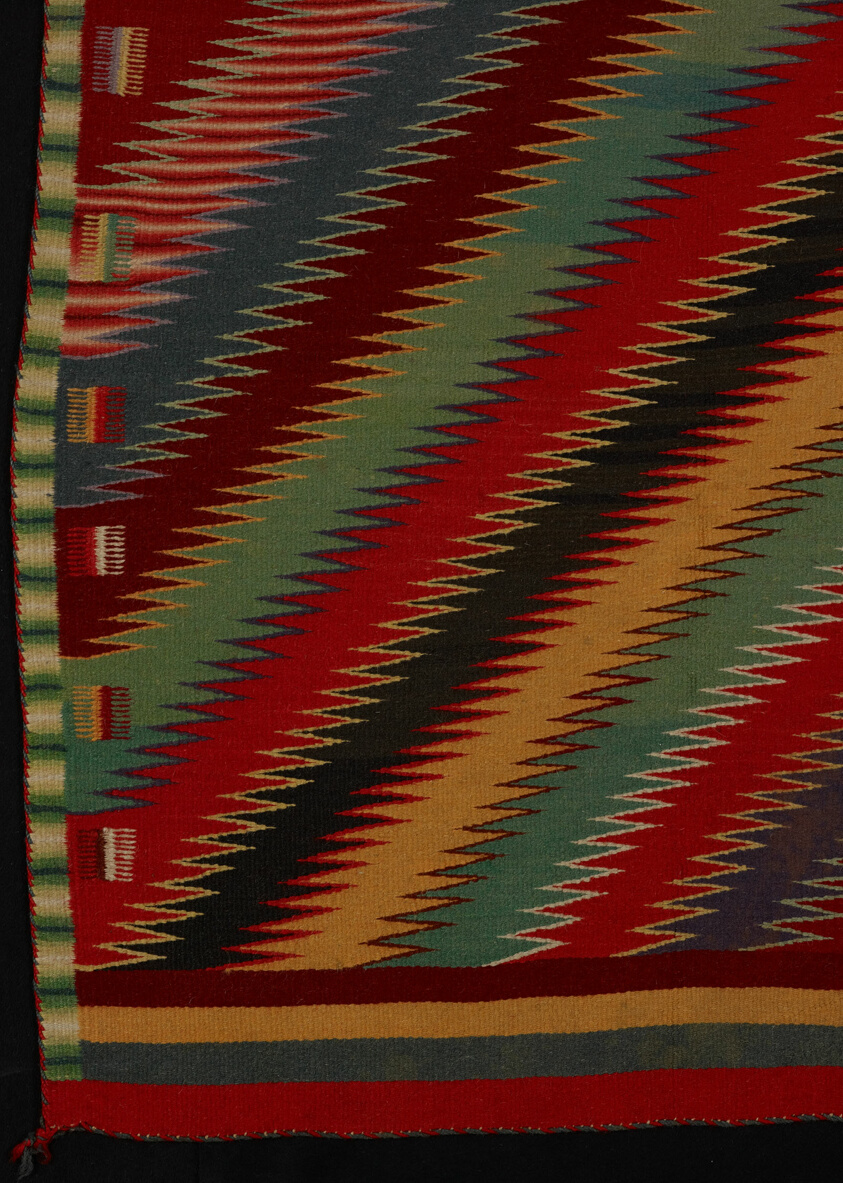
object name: Textile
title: "Eye-Dazzler" Weaving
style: navajo, native american, americas, Folk Art, 19th century, indigenous, north american, native north american, eye-dazzler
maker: Navajo (Diné) (Arizona, New Mexico, and Utah, United States)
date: 1880/1900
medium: Cotton and wool, single interlocking tapestry weave; twined selvages and heading, overcast finish terminating in tassels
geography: Navajo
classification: textile; weaving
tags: geometric, zigzags